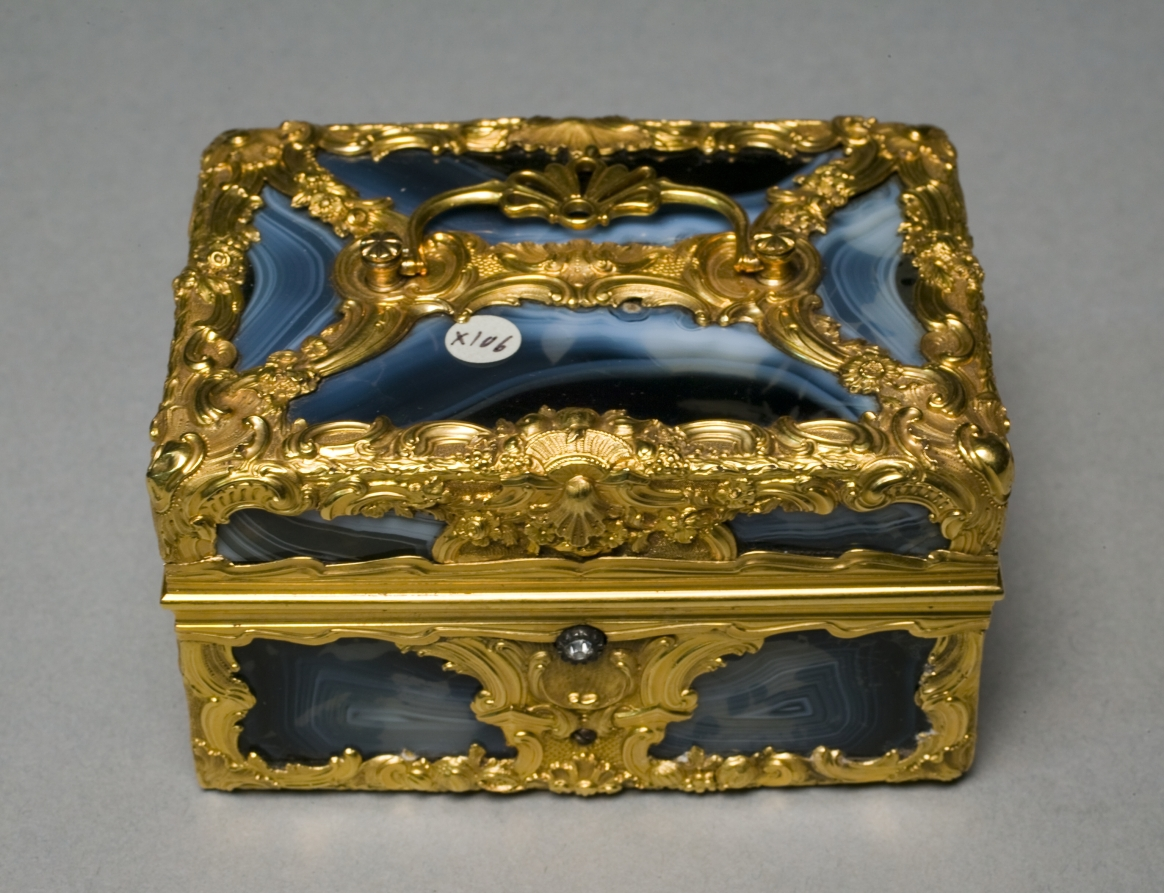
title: Vanity Case (Nécessaire)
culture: England, mid 18th century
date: c. 1760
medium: gold, agate, interior fitted with gold-mounted implements, mirror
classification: Miscellaneous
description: Luxurious personal objects were an essential part of a privileged wardrobe during the 1700s and early 1800s, emphasizing their owner’s refinement and wealth. Jewelry, miniatures, and nécessaires—small expensive sets designed to hold grooming, writing, and sewing tools—were often given as intimate gifts, intended to be seen and admired. Their glittering surfaces, however, disguised a system based on the labor and suffering of enslaved or indentured people, whether in gold and stone mines or shops where these goods were made.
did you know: This small box contains gold-mounted writing instruments, including three ink wells, a fountain pen, a clasp knife, and tweezers.